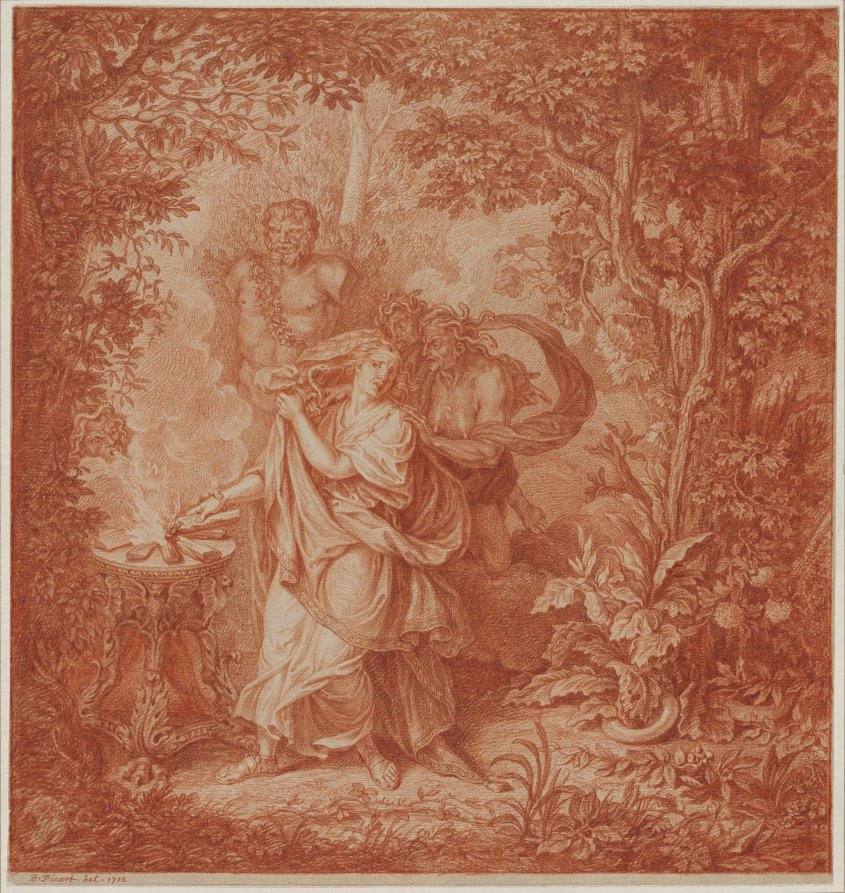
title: Althaea Putting the Fatal Log on the Fire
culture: France, 18th century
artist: Bernard Picart (French, 1673–1733)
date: 1712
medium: Red chalk on beige laid paper, incised for transfer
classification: Drawing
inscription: signed, lower left, in red chalk: B. Picart. del. 1712; verso, lower left, in blue crayon: 136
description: This drawing depicts a scene from the life of Meleager, a figure from Greek mythology who was prophesied to die when a log in the fireplace at the time of his birth completely burned. At that time, Meleager’s mother, Althaea, put out the log and stowed it away for safekeeping. Years later, in the scene depicted here, Althaea exacts revenge on Meleager for killing her brothers in a dispute. Two Furies, goddesses of vengeance, compel the anguished mother to punish her murderous son by burning the fatal log. Picart made this drawing while overseeing the reproduction of Le Brun’s suite of tapestries narrating tales of Meleager into prints. Picart himself made drawings from the tapestries, of which this sheet is an example. The drawings were then used as guides by printmakers Picart hired to re-create the images as engravings.